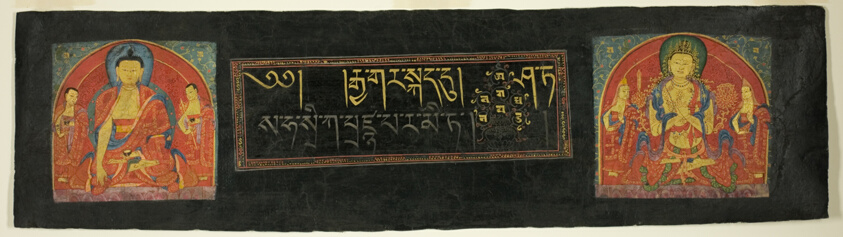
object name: Book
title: Page from the Perfection of Wisdom Sutra (Astasahasrika Prajnaparamitasutra)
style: Himalayan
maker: Western Tibet; Guge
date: 16th century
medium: Colors and gold on paper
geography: Western Tibet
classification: painting; asian art; book